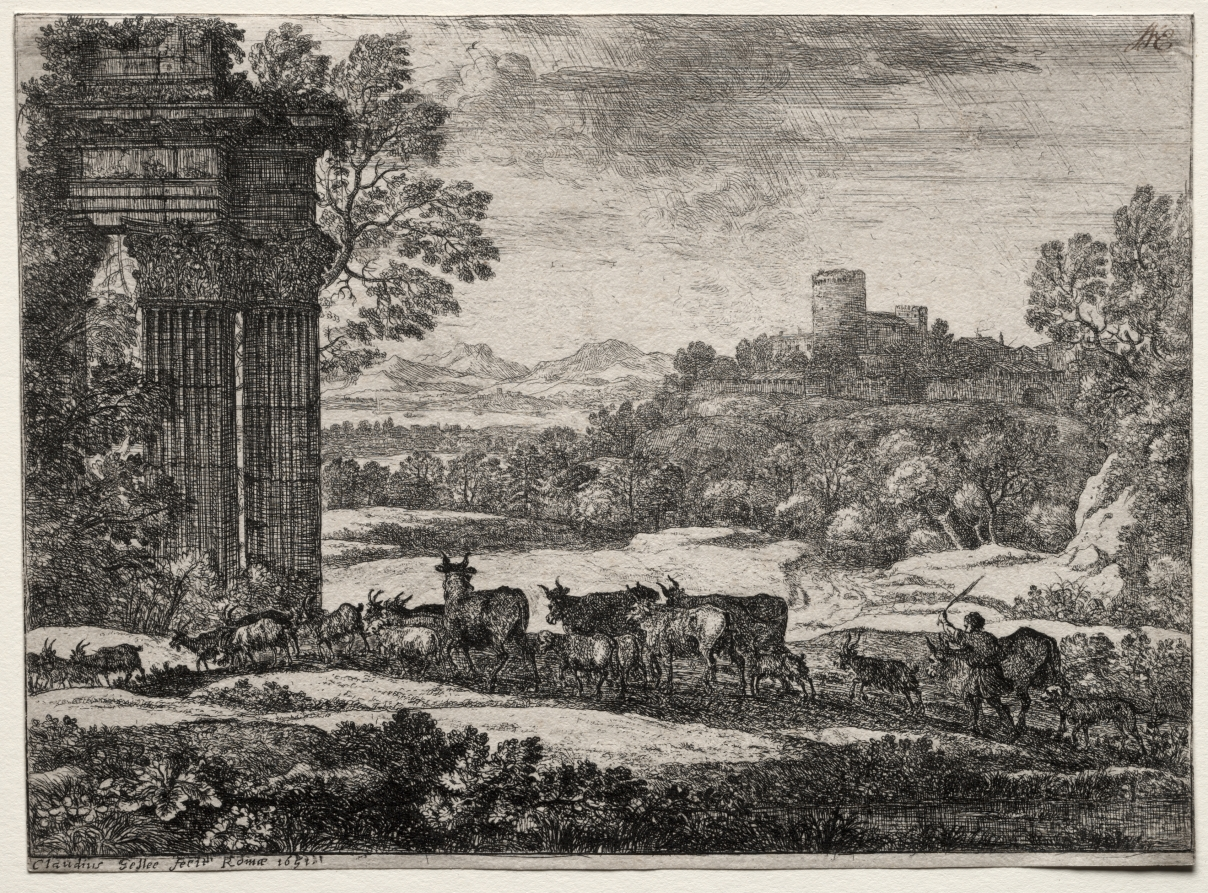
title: The Herd Returning in Stormy Weather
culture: France, 17th century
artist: Claude Lorrain (French, 1604–1682)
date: 1651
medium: etching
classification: Print